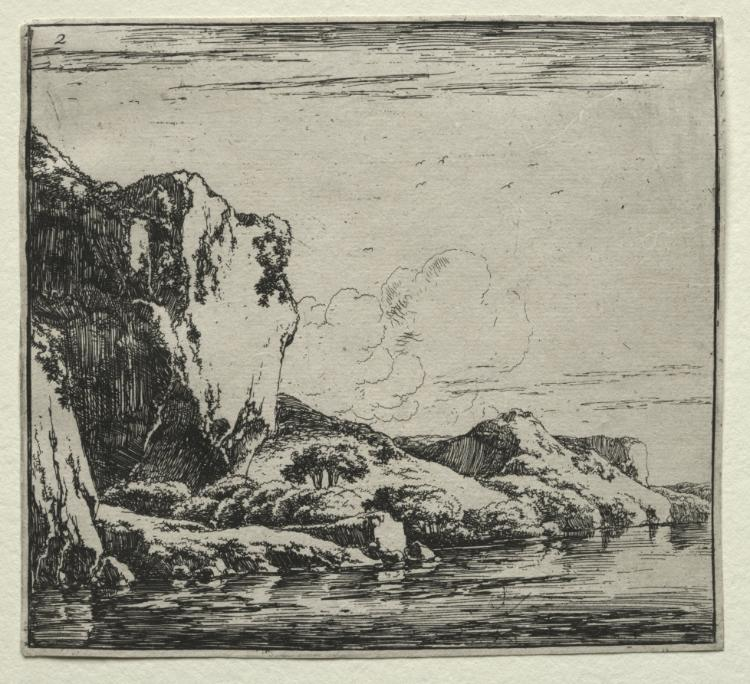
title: The Rock at the Border of a Large River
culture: Flanders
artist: Herman Naiwincx (Flemish, c. 1624–after 1651)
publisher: Clement de Jonghe (Dutch, 1579–1679)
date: 1640–51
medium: etching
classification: Print